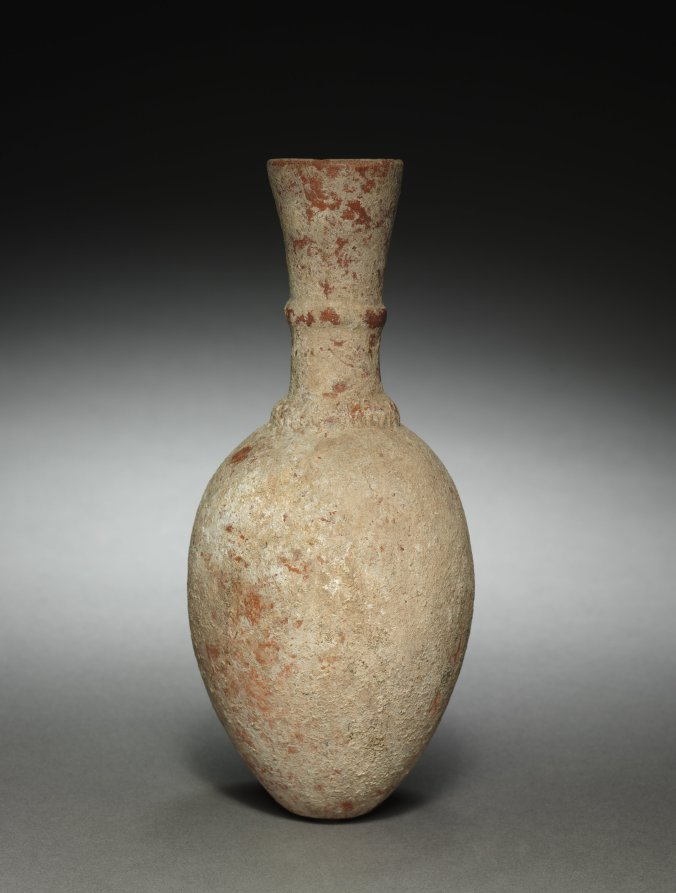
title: Jug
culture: Iran, Amlash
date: c. 1000 BCE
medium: terracotta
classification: Ceramic